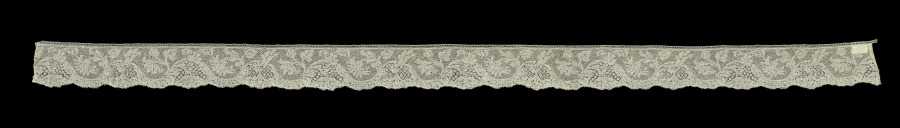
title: Lace Edging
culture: Belgium, Binche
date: 1700s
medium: Linen: bobbin lace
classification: Lace